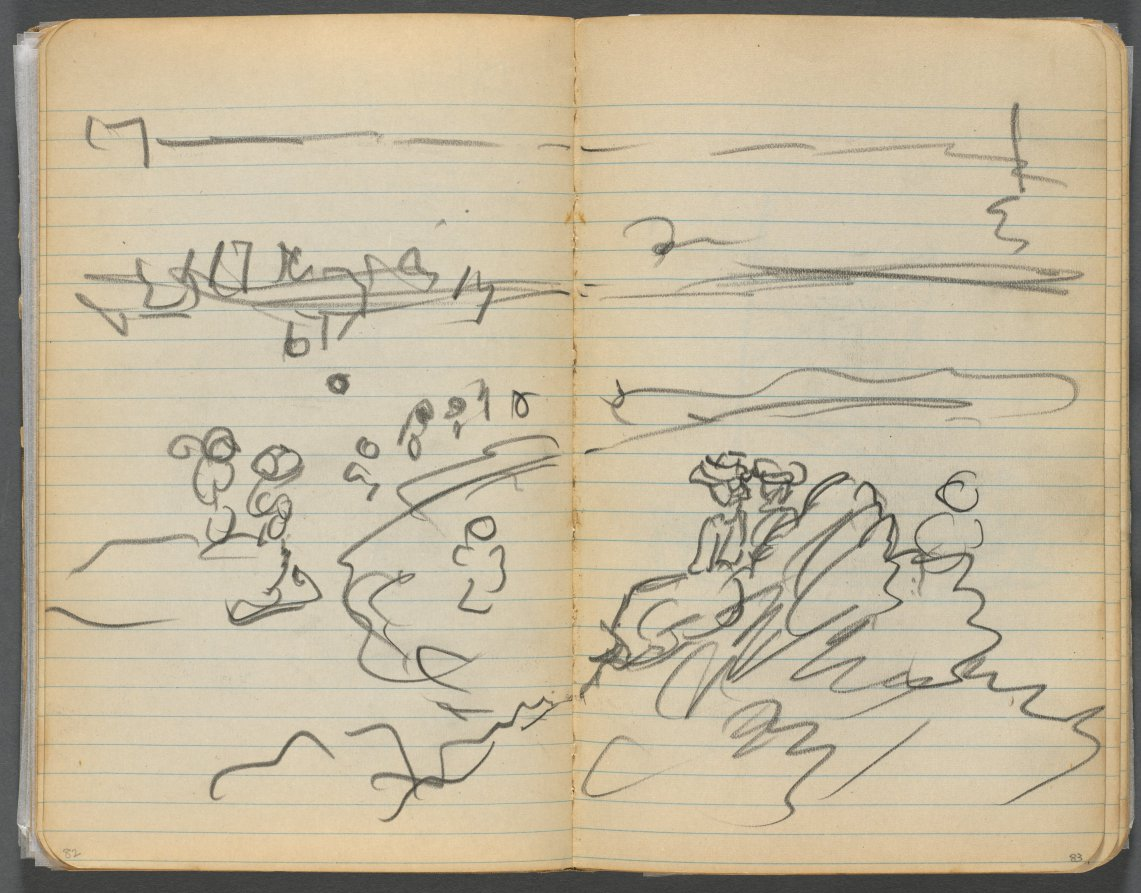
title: Sketchbook, page 082 & 83: Beach View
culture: America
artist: Maurice Prendergast (American, born Newfoundland [now Canada], 1858–1924)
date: 1905–10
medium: graphite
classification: Bound Volume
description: This sketchbook contains 69 pages of drawings, a diary largely devoted to the state of the artist's health, and a three-page discourse on the nature of genius and ideas.